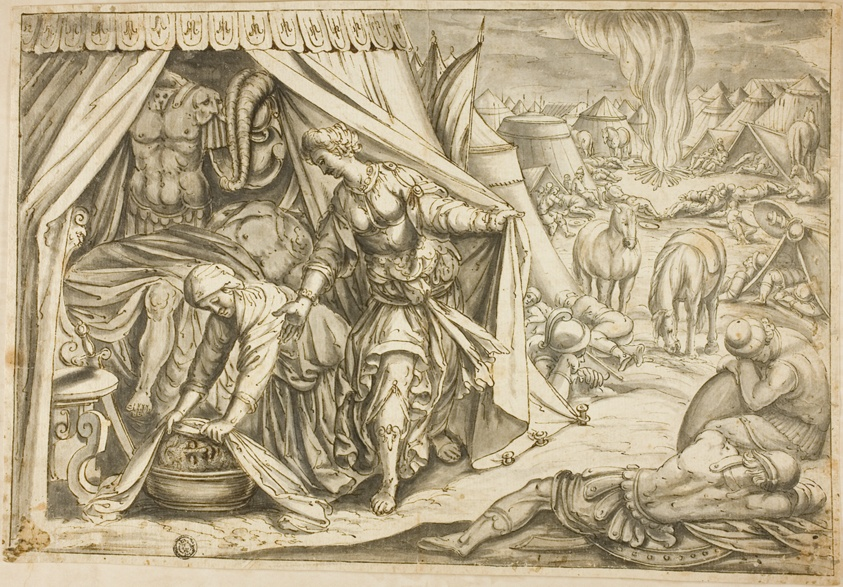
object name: Drawing and Watercolor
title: Judith and Holofernes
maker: After Antonio Tempesta; Italian, 1555-1630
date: After 1613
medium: Pen and brown and black ink, with brush and black wash, on ivory laid paper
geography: Flanders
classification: pen and ink drawings; drawings (visual works); prints and drawing